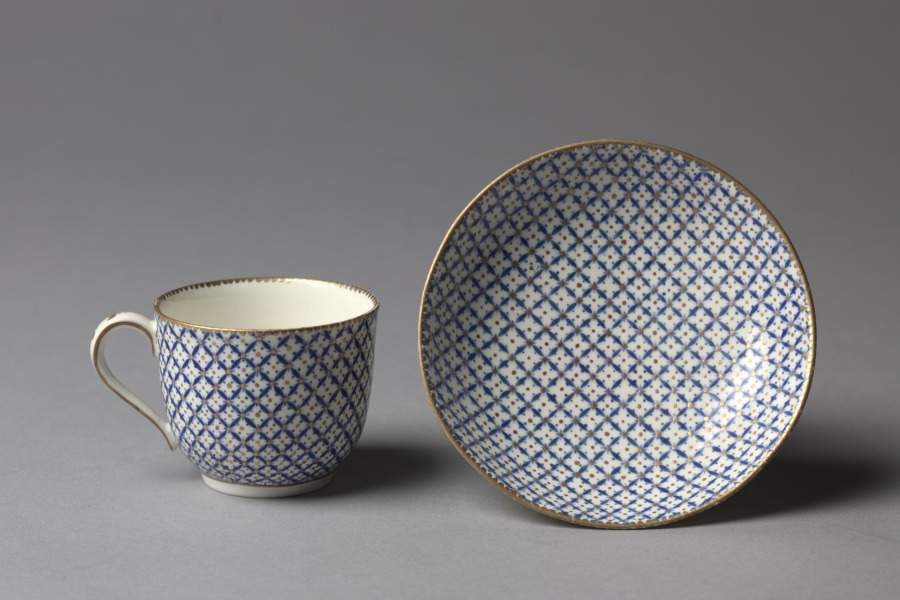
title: Cup and Saucer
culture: France, Chantilly, 18th century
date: c. 1760–70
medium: porcelain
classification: Ceramic